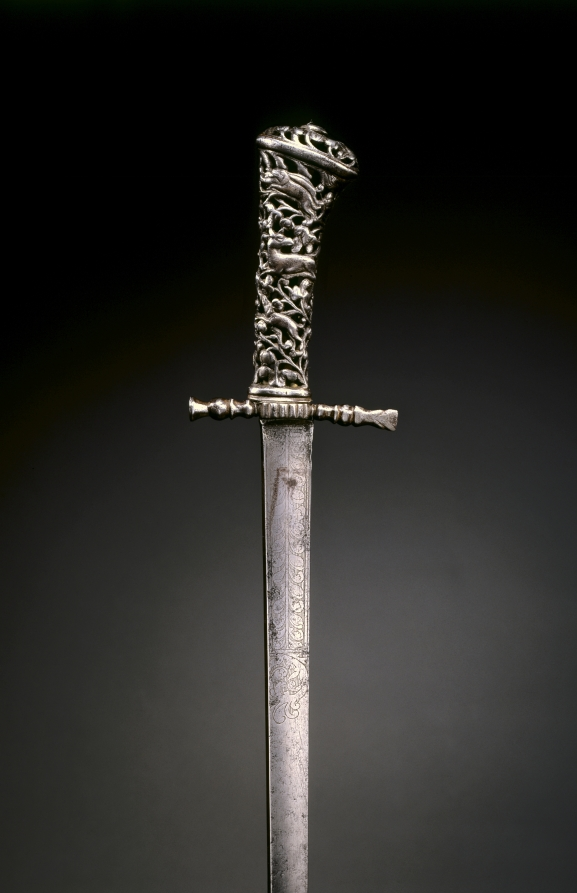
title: Hunting Sword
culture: Netherlands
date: c. 1760–70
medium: steel; pierced and chiseled cast-iron hilt ; blade engraved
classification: Arms and Armor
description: No gentleman's hunting costume was complete without a hunting sword. These special sidearms, designed primarily as defense against dangerous game in the field, were also used to dispatch game at the end of a chase. It was a point of honor among aristocratic hunters to carve and section the game in the field, a further function for which these swords were well suited. They were often made as a set, or garniture, and included smaller knives, forks, and other implements for carving the carcass.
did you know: Besides being viewed as a recreation for European nobility and an ancient and hereditary right, hunting was recognized as a necessary and pragmatic skill which supplied an additional source of food and dispatched animals which were considered a menace.